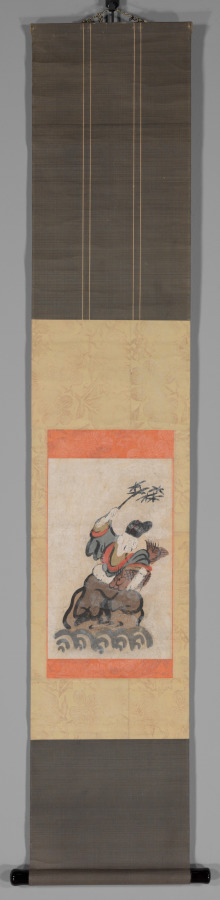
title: Ebisu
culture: Japan, Edo period (1615–1868)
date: 1800s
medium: hanging scroll, ink and color on paper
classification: Painting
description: Ebisu, one of the Seven Gods of Good Fortune, takes the guise of a Shinto priest who blesses his catch, a sea bream, with a branch of the camellia tree.